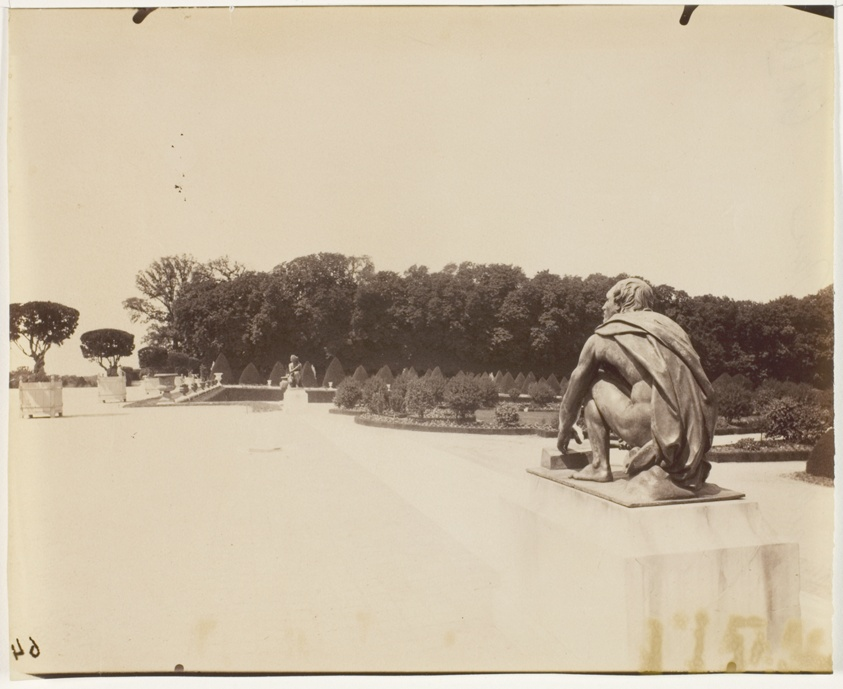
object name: Photograph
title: Versailles, Coin de Parc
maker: Jean-Eugène-Auguste Atget (French, 1857–1927)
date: 1903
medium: Albumen print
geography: France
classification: albumen silver print; photographic process; photography; photograph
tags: Collected by Hugh Edwards